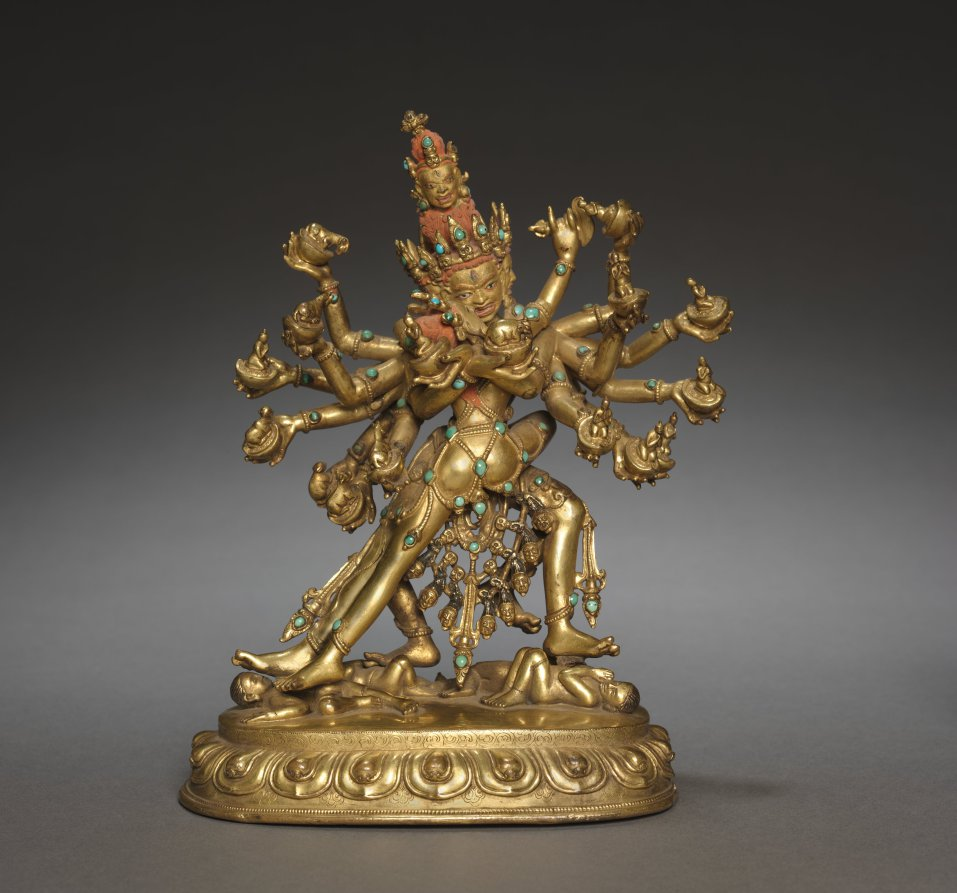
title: Hevajra and Consort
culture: Tibet, 17th century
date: 1600s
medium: gilt bronze inlaid with semiprecious stones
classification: Sculpture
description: The use of this piece in a ritual context would have indicated that practitioners were following the methods for reaching enlightenment set forth in the Hevajra Tantra text. Nairatmya, the female consort of Hevajra, appeared to the yogi Virupa (at left) in a vision and revealed to him the contents of the text, which was then passed down through a lineage of disciples. An emanation of Akshobhya, the Cosmic Buddha of the East, Hevajra holds a skull bowl in his 16 hands. The rear pair of Hevajra's four legs is shown in a dynamic dance posture, while his front two legs are in a lunge, trampling the miserable personifications of ignorance and the false sense of ego. Also trampling them is the left foot of his consort Nairatmya, who has her other leg wrapped around his waist. The figures are explicitly shown in sexual union, indicative of the bliss that comes from conquering all impediments to enlightenment.